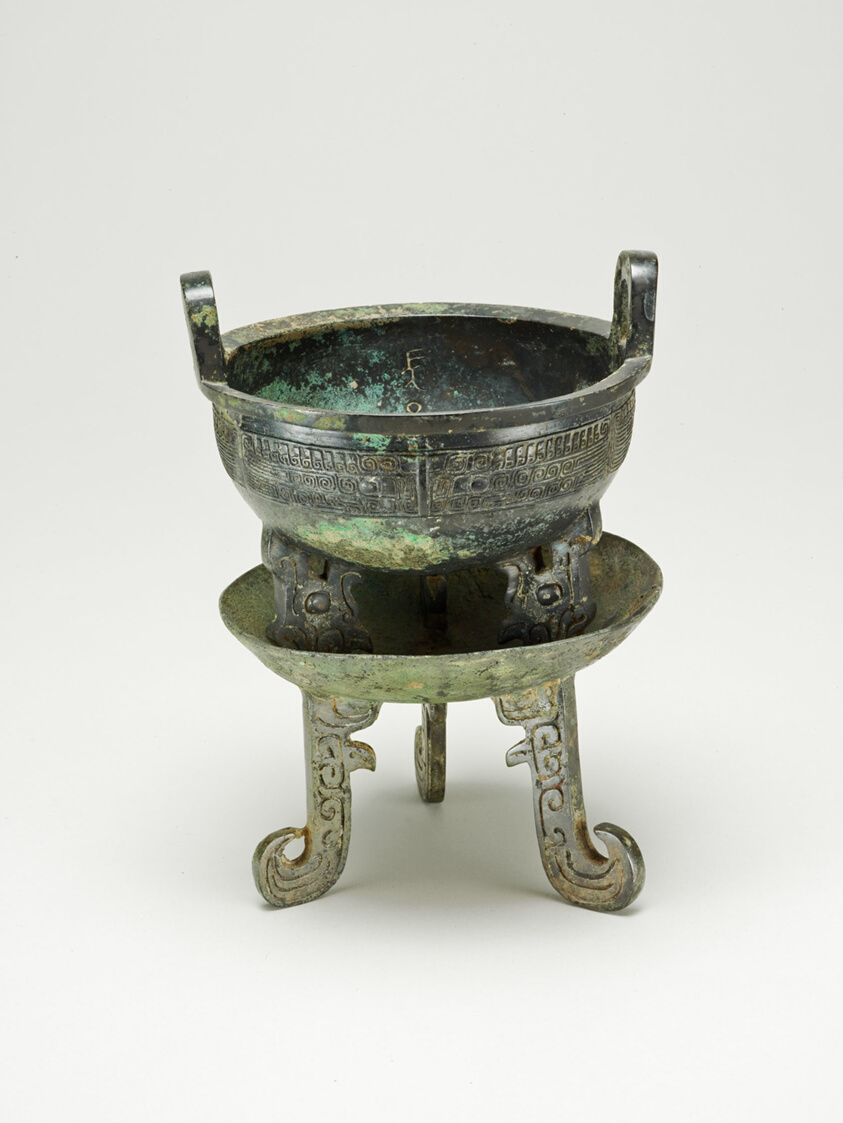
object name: Vessel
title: Small Tripod Cauldron of Chang Zi (Chang Zi ding)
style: Chinese (culture or style)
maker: China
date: Western Zhou dynasty, 1046–771 B.C.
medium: Bronze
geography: China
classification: bronze; metal; vessel; asian art